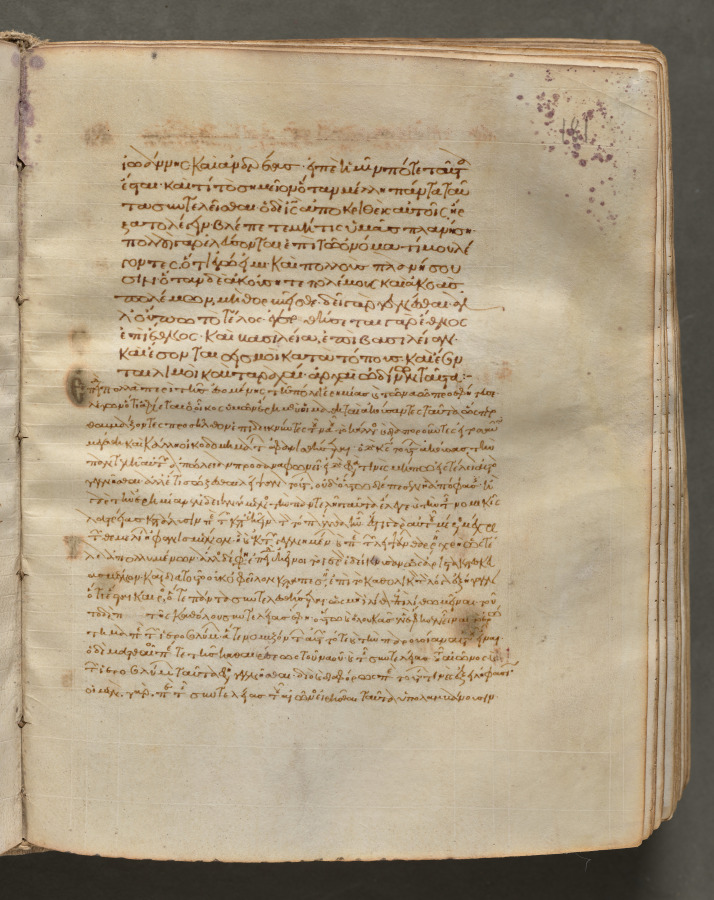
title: Text, folio 181 (recto), from a Gospel Book with Commentaries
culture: Byzantium, Constantinople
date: c. 1000–1100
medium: ink, tempera, and gold on vellum; leather binding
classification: Bound Volume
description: Each of the four gospels in this book opens on a page with brilliantly illuminated borders depicting the author of the text as well as birds-principally peacocks, symbols of the immortality of the soul-and fountains, representing the fountain of life and the salvation of the soul. This volume consists of 428 leaves with texts in Greek. Its level of sophistication suggests that it was probably written and decorated in a monastery in Constantinople.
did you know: Gospel Books were carried in procession through Byzantine churches.